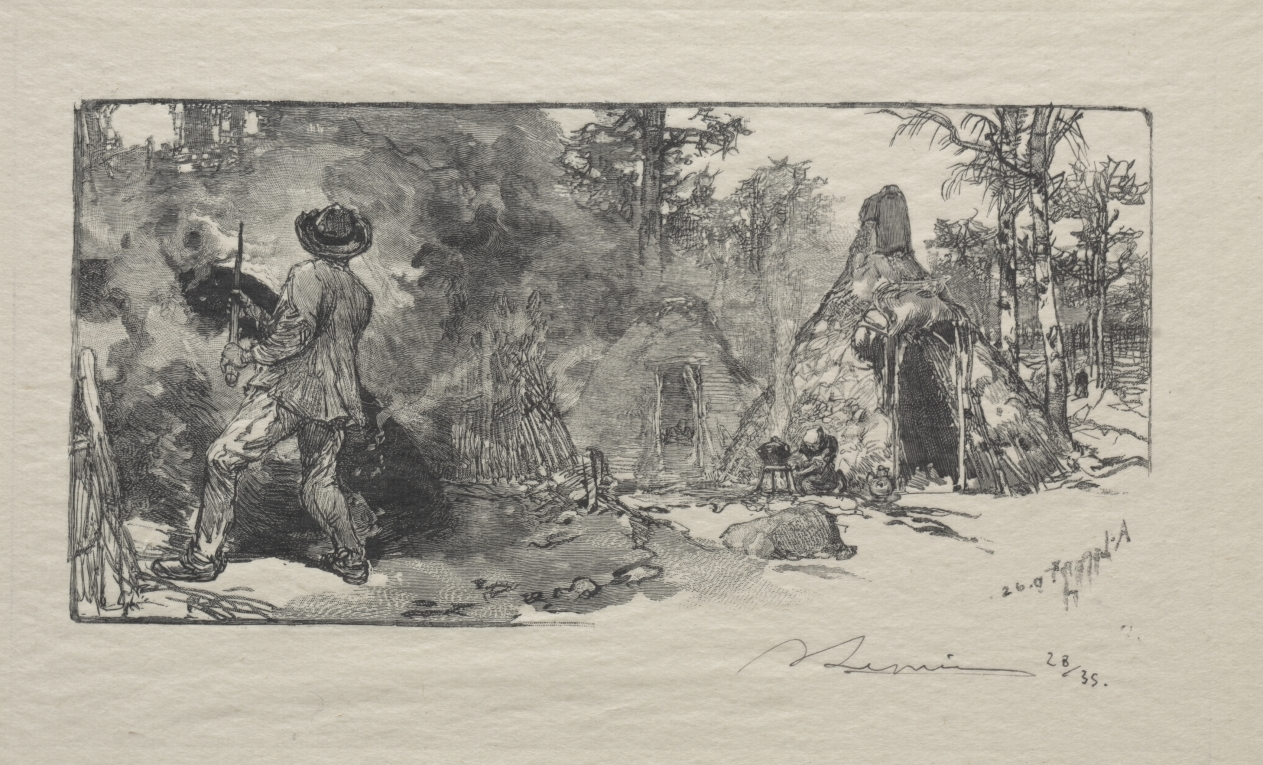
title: Les Charbonniere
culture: France, 19th century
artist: Auguste Louis Lepère (French, 1849–1918)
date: 1887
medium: wood engraving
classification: Print